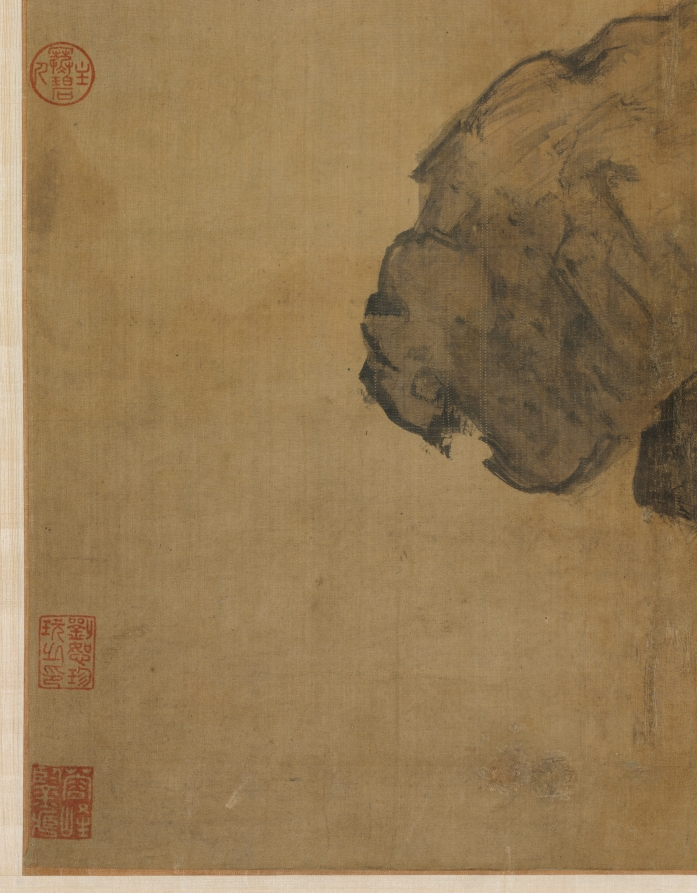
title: Lonely Retreat Overlooking a Misty Valley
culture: China, Ming dynasty (1368–1644)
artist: Sheng Maoye (Chinese, active early 1600s)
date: 1630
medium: hanging scroll; ink and slight color on silk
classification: Painting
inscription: Artist's inscription, signature, and 2 seals: In the tenth month of the gengwu year of the Chongzhen era [1630]. Sheng Maoye [seals] Sheng yin Maoye; Yuhua shi.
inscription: 4 additional seals of Liu Shu (1759–1816)